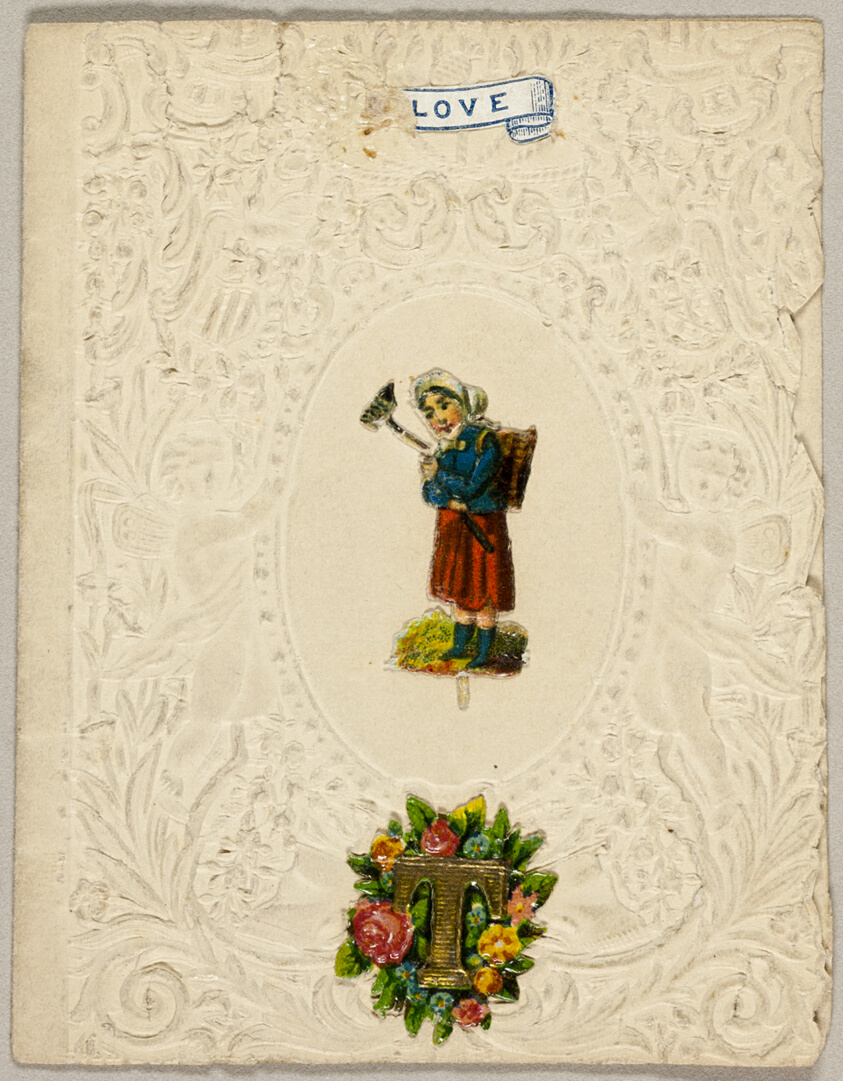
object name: Drawing and Watercolor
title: Love (Valentine)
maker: Unknown Artist; American or English, 19th century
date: 1860/69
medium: Collaged elements on embossed cream wove paper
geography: United States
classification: collage; valentine; prints and drawing; paper